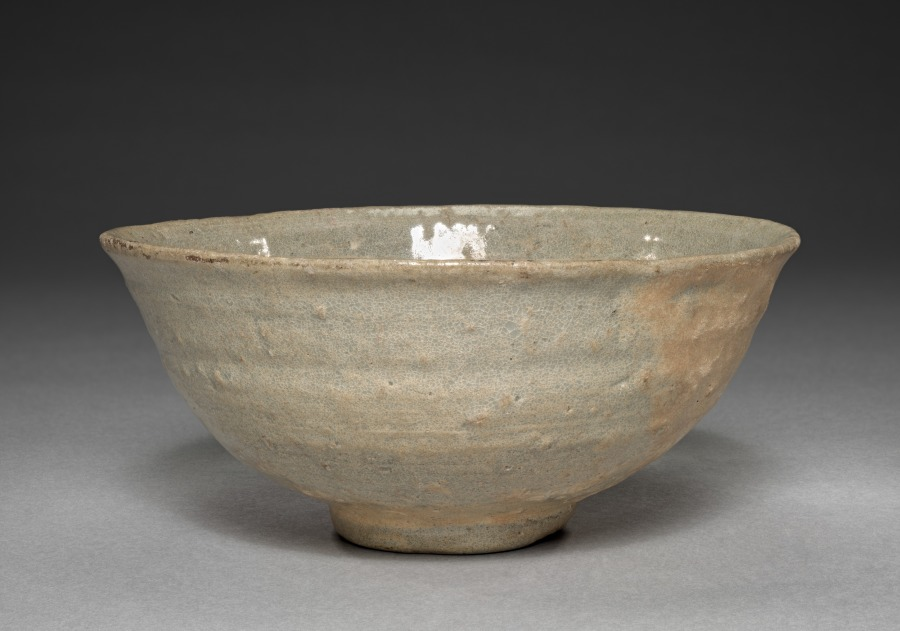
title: Bowl with White-slip Decorations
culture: Korea, Joseon dynasty (1392–1910)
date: 1600s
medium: glazed ceramic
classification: Ceramic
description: This type of wide-mouthed bowl was used every day in Korea, not exclusively for tea drinking. But when it was introduced to Japan around the early 1500s its imperfect appearance evoking the aesthetics of wabi-sabi caused it to be repurposed as a tea bowl. Korean tea bowls were circulated as a item of foreign luxury among Japanese military elites. It's highly possibly this type of bowl was produced in one of the kilns operated by the trading office Busan in Southern Gyeongsang province, and exported to Japan.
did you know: This type of rustic tea bowl was highly appreciated among advanced Japanese practitioners of the tea ceremony.